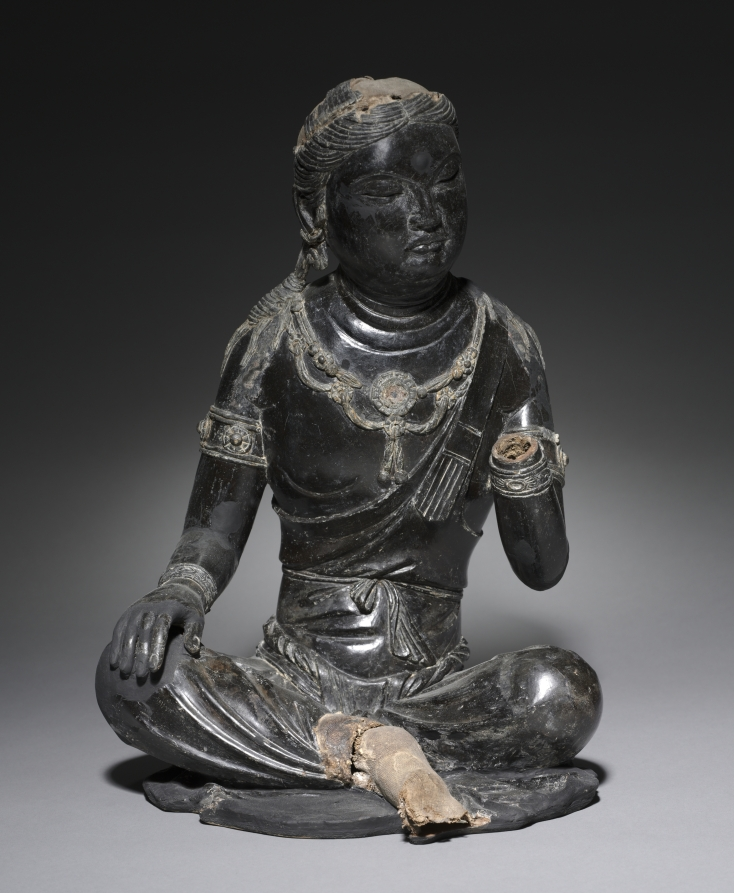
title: Bodhisattva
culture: China, Tang dynasty (618-907)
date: 700s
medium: dry lacquer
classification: Sculpture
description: The bodhisattva, an enlightened being dedicated to the spiritual awakening of all beings, is shown sitting in a relaxed pose, the eyes half-closed in an expression of profound meditation. The statue is modeled in a sensuous manner. It is made using the dry lacquer technique whereby a clay core is first constructed and then overlaid with fabrics saturated with lacquer. Once the lacquer layers are set, the core is removed. This kind of hollow dry lacquer statue is lightweight and easy to carry. The piece once suffered from severe surface retouching that distorted its original beauty. The museum's conservation work has removed coats of overpainting and over-restoration, revealing the true appearance of the glossy black lacquered surface with traces of cut-gold decoration and pigments.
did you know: While lacquer is tough and impervious to insects, it is less durable than wooden or stone sculptures, so this is a rare surviving Tang example.